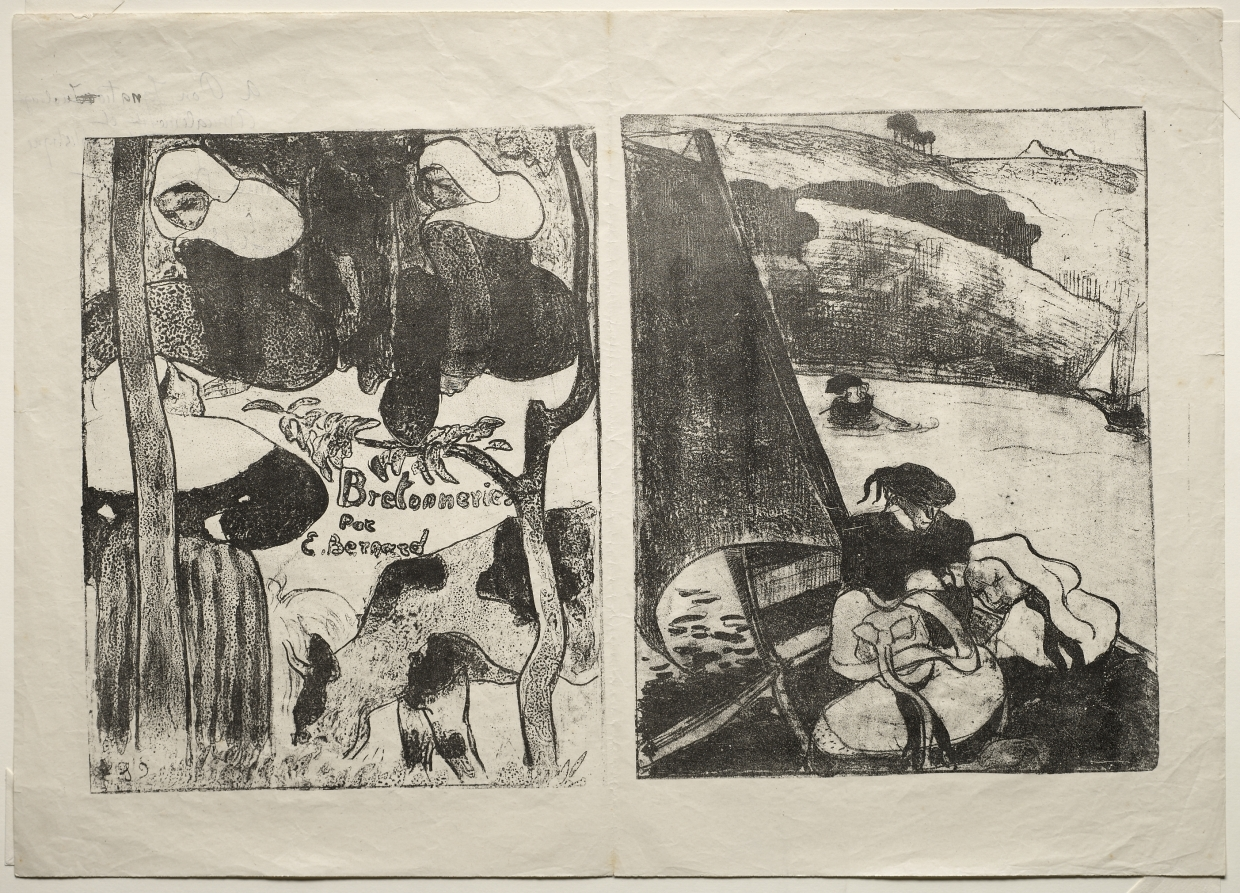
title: Les Bretonneries: Title Page (Page de Titre) and The Return from the Pilgrimage (Le Retour du Pardon)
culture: France, 19th century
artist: Émile Bernard (French, 1868–1941)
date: 1889, printed 1896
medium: zincograph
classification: Print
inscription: inscribed on verso of title page: A Don Ignatio Zuloago/ Amicalement et/ avec Grattitude artistique/ Emile Bernard/ Seville 1897